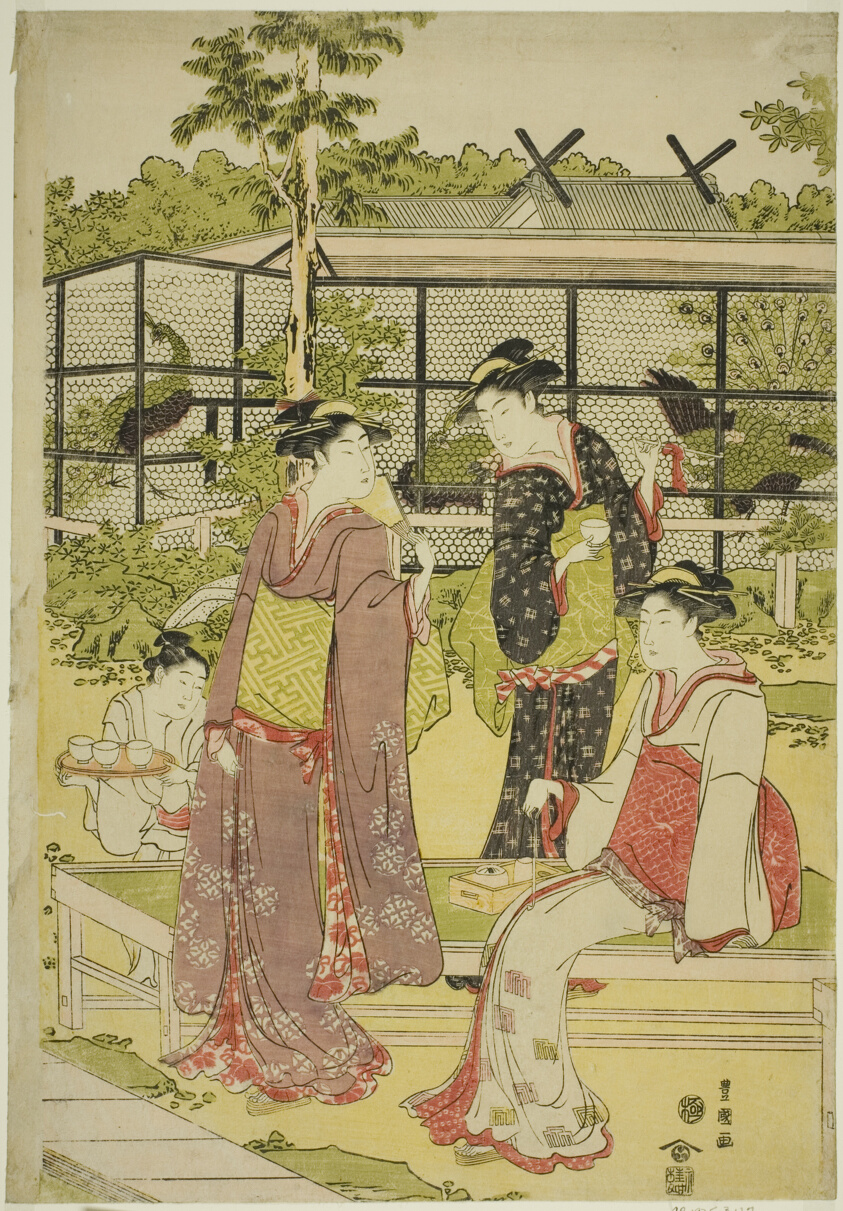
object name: Print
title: Women Visiting the Bird and Flower Teahouse (Kachojaya)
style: Japanese (culture or style)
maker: Utagawa Toyokuni I 初代 歌川 豊国; Japanese, 1769–1825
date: c. 1792/93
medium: Color woodblock print; center sheet of oban triptych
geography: Japan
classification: woodblock print; print; asian art